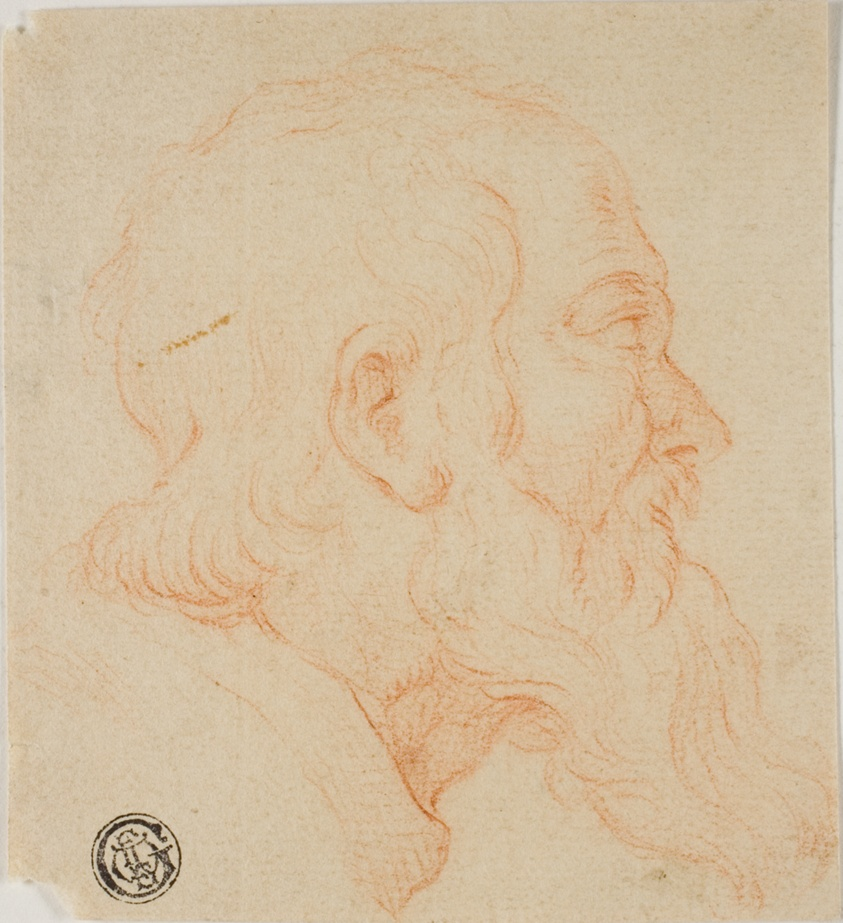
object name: Drawing and Watercolor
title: Head of Old Man in Profile to Right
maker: Possibly Follower of Simone Cantarini (Italian, 1612-1648); or Style of Domenico Cresti (Italian, 1559-1638)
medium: Red chalk, on cream laid paper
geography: Italy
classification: drawings (visual works); prints and drawing